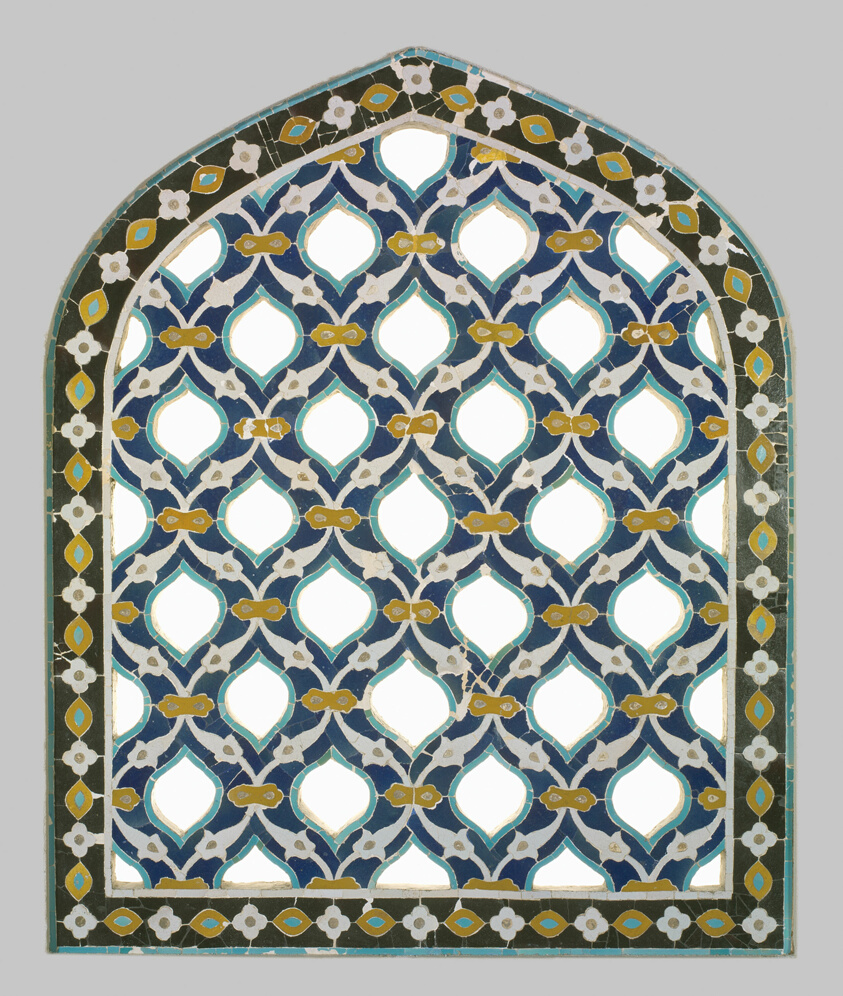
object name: Architectural fragment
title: Tile Window Grille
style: Islamic (culture or style)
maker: Iran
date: Timurid dynasty (1370-1507), 15th century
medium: Glazed fritware tiles cut and reassembled as a mosaic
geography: Iran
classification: ceramics; architectural fragment; asian art